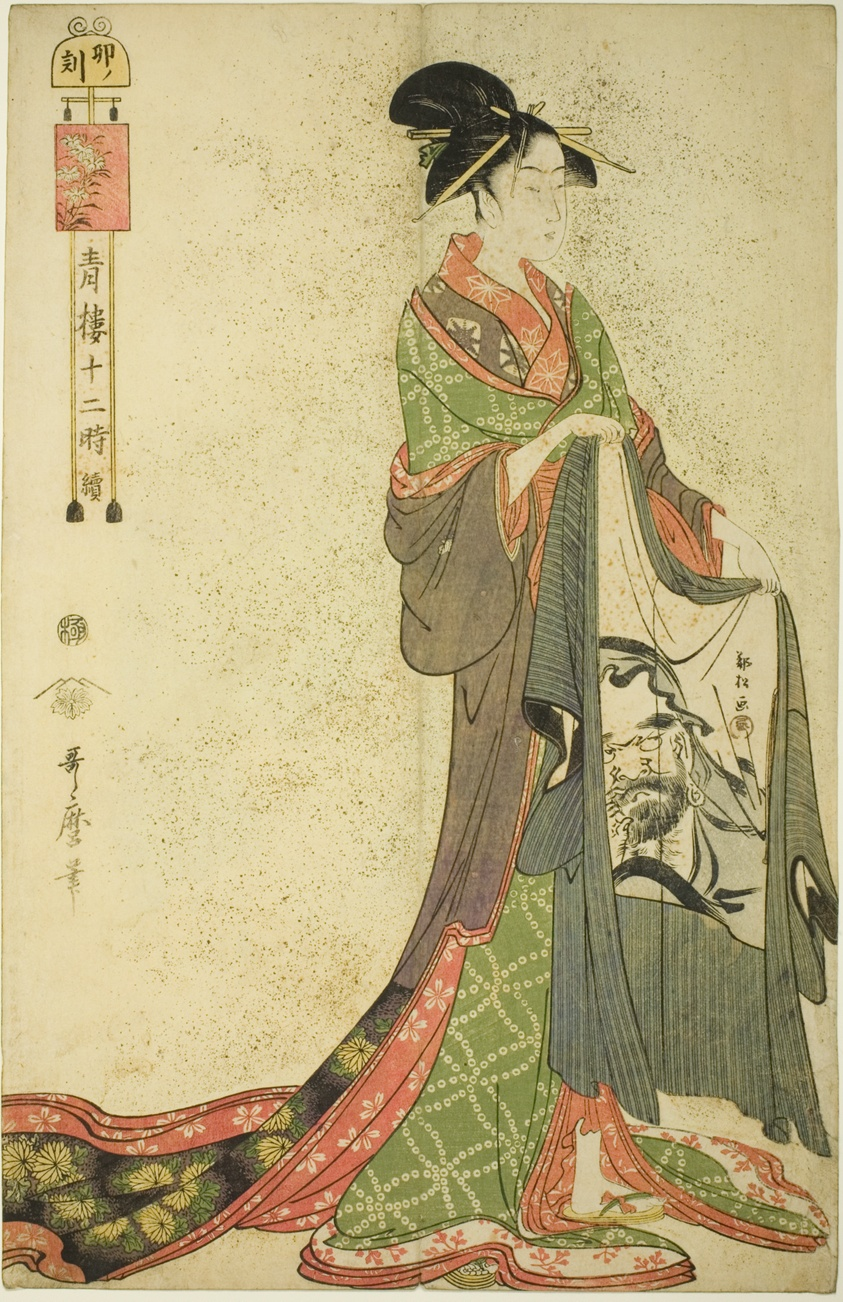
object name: Print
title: Hour of the Hare [6am] (U no koku), from the series “The Twelve Hours in Yoshiwara” ("Seiro juni toki tsuzuki")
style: Japanese (culture or style)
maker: Kitagawa Utamaro 喜多川 歌麿; Japanese, 1753 (?)-1806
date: c. 1794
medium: Color woodblock print; oban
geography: Japan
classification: woodblock print; print; asian art